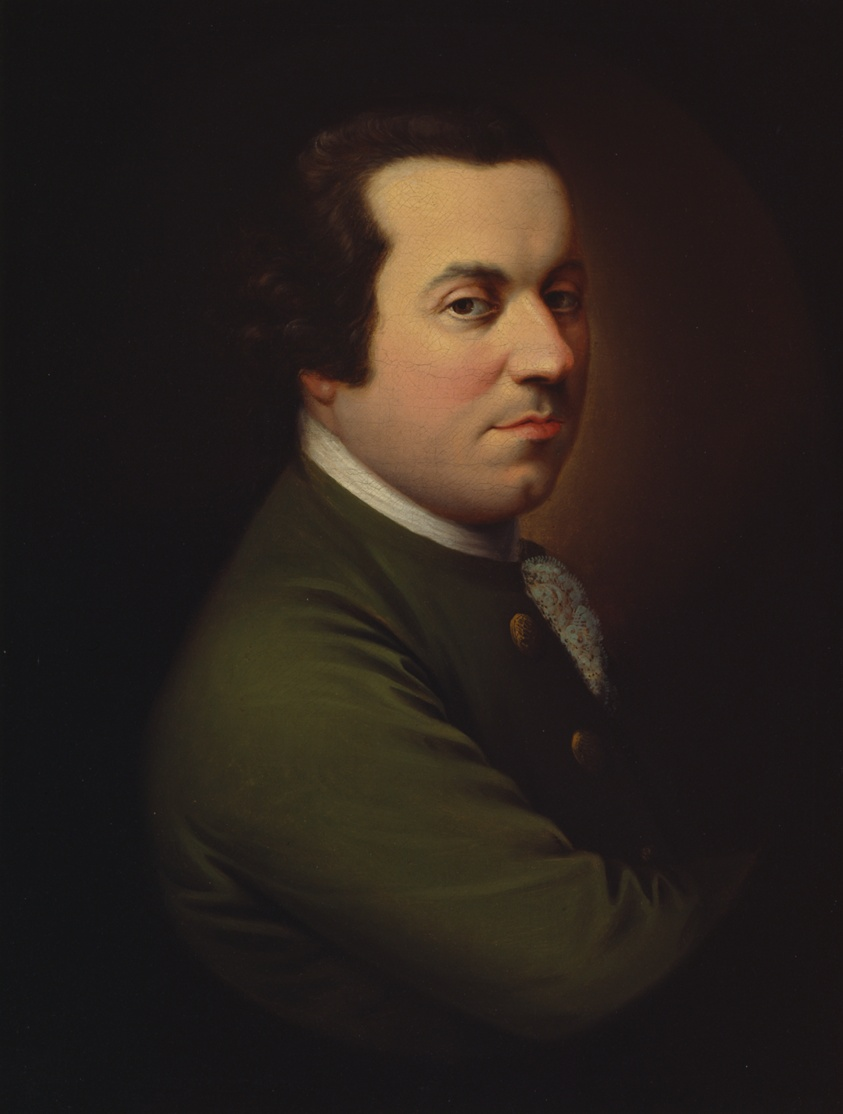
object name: Painting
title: Dr. Jonathan Potts (1745-1781)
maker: Henry Benbridge (American, 1743–1812)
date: 1770–76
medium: Oil on canvas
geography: Philadelphia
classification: painting; american arts